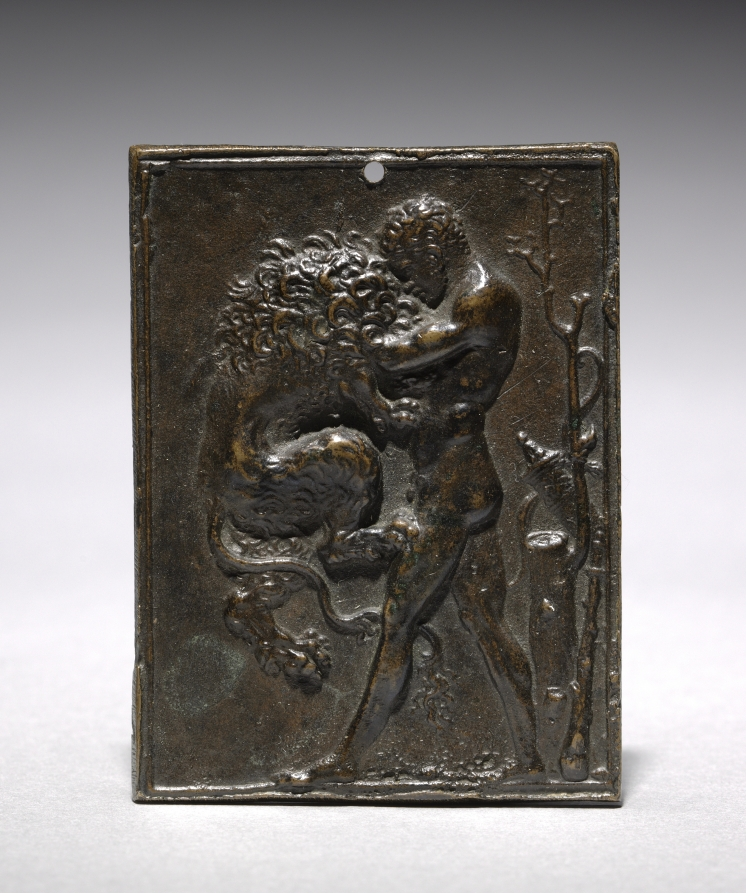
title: Hercules and the Nemean Lion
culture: Italy, 16th century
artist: Moderno (Italian, 1467–1528)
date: 16th century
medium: bronze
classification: Sculpture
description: This plaquette by Moderno, a Northern Italian sculptor active in the early 1500s, displays the ancient subject of Hercules wrestling the Nemean lion. The subject of this plaquette finds its origins in the ancient myth of the Twelve Labors of Hercules, a popular theme during the Renaissance. After killing his wife and child in a fit of rage, Hercules was sent by an oracle to be punished by King Eurystheus of Tiryns. The King presented Hercules with twelve challenges, the first of which was to kill the Nemean lion. Twice as large as a normal lion, it had an impenetrable hide, symbolic of the uncontrollability of nature. Hercules tracked the lion to its cave, and after failing to kill it with the arrows of Apollo, Hercules strangled the lion with his bare hands. As Hercules' strength allowed him to defeat the lion, the myth expresses human dominance over nature. Hercules then used the lion's razor-sharp claws to remove its skin and returned to King Eurystheus wearing the impenetrable skin as protection. To honor the lion's struggle against Hercules, Zeus transformed the lion into the constellation Leo. In this scene, the nude Hercules stands in profile facing left with his left foot resting on the plaquette's lower border. The plaquette has no background other than a barren tree against which rest Hercules's club and Apollo's quiver and bow. The lion rests its rear paw on Hercules' thigh as Hercules lifts the lion off of the ground. The lion's body and mane consists of stylized tufts of fur which contrast with the smooth, naturalistic form of Hercules' body. The minute, short curling lines of the hair and mane create a rhythmic effect while the smooth curves of the forms place an emphasis on contour-this contrast of visual rhythm with smooth form is in fact characteristic of Moderno's bronze relief sculpture. The composition meanwhile has its origin in ancient Greek coins as well as Renaissance cameos.